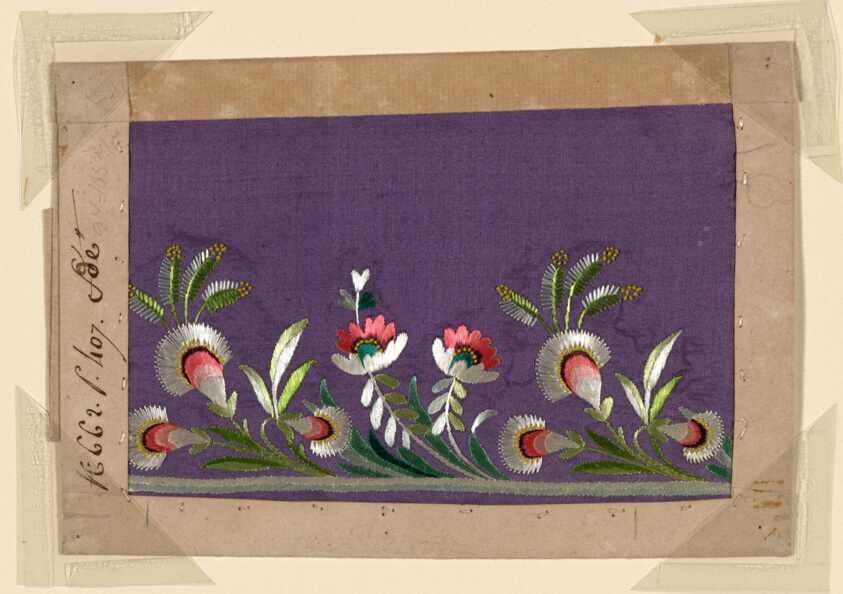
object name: Textile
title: Salesman's Sample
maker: Probably France, Lyon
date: 1780-1810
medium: Silk, warp-faced plain weave; embroidered with silk floss in satin stitch; French knots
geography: France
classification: textile; needlework (visual works); costume; costume - embroidery; embroidery; needlework - costume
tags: flowers, floral motifs